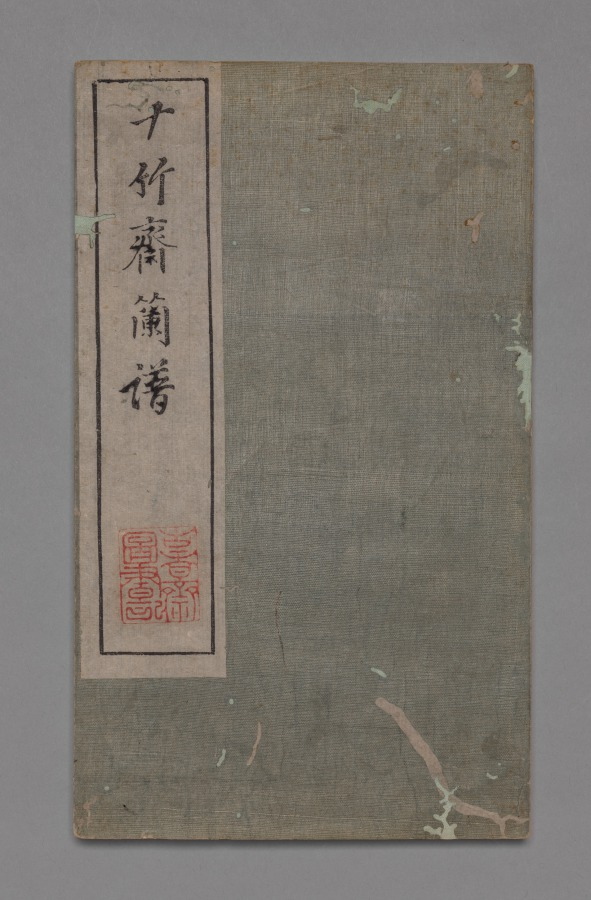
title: Ten Bamboo Studio Painting and Calligraphy Handbook (Shizhuzhai shuhua pu): Orchids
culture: China, Qing dynasty (1644-1911)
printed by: Hu Zhengyan (Chinese, c. 1584–1674)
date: 1633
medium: Woodblock-printed book; ink and colors on paper; first edition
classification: Print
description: Color printing reached a level of perfection in the early 1600s, as seen in this Ten Bamboo Studio Collection of Calligraphy and Painting and the Mustard Seed Garden Manual of Painting (printed 1679 and 1701). The painterly quality, precision in registering (aligning) the woodblocks, and harmonious colors made them the most successful color print editions in Chinese history. Both editions were printed and compiled in Nanjing, spread nationwide, and had a great impact on the arts in Japan and Korea.